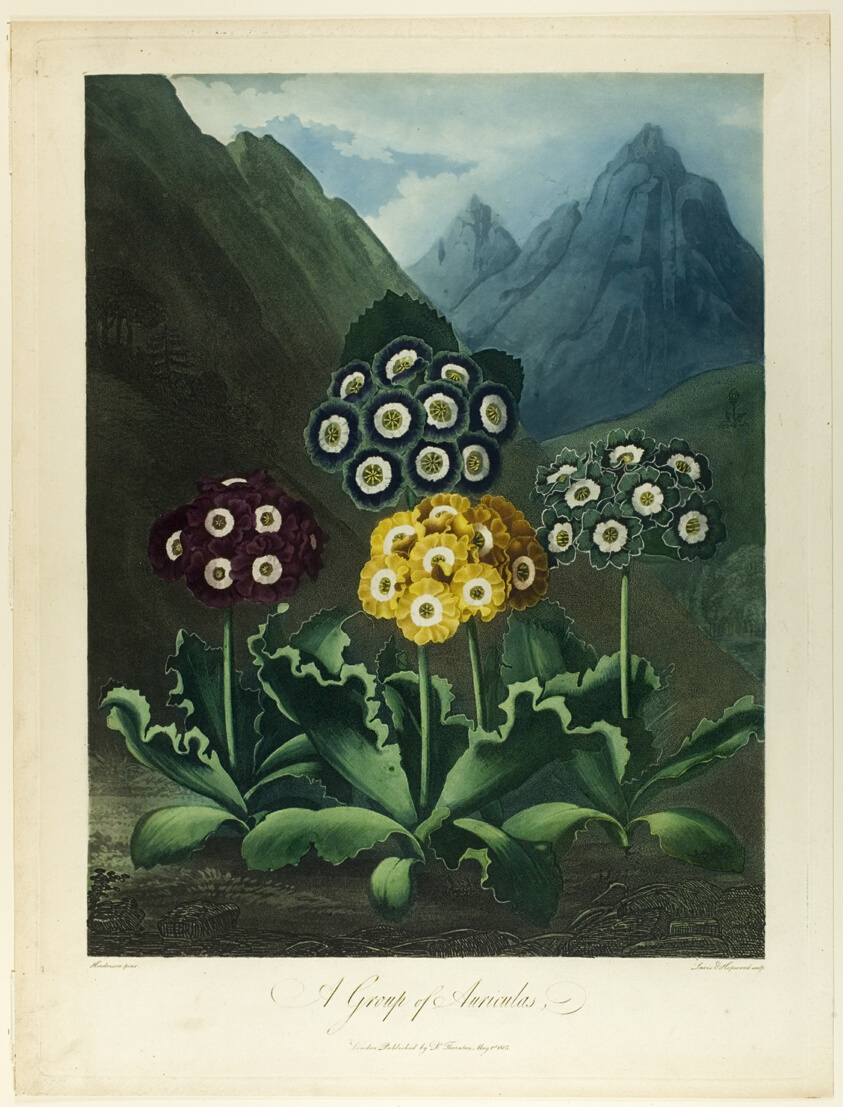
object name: Print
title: A Group of Auriculas, from The Temple of Flora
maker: Frederick Christian Lewis, the elder (English, 1779-1856); James Hopwood, the elder (English, c. 1752-1819); after Peter Charles Henderson (English, active 1791-1829); published by Dr. Robert John Thornton (English, 1768-1837)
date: 1803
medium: Color aquatint, with stipple engraving and etching, inked à la poupée, heightened with hand-colored watercolor on cream wove paper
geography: England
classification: aquatint; print; prints and drawing